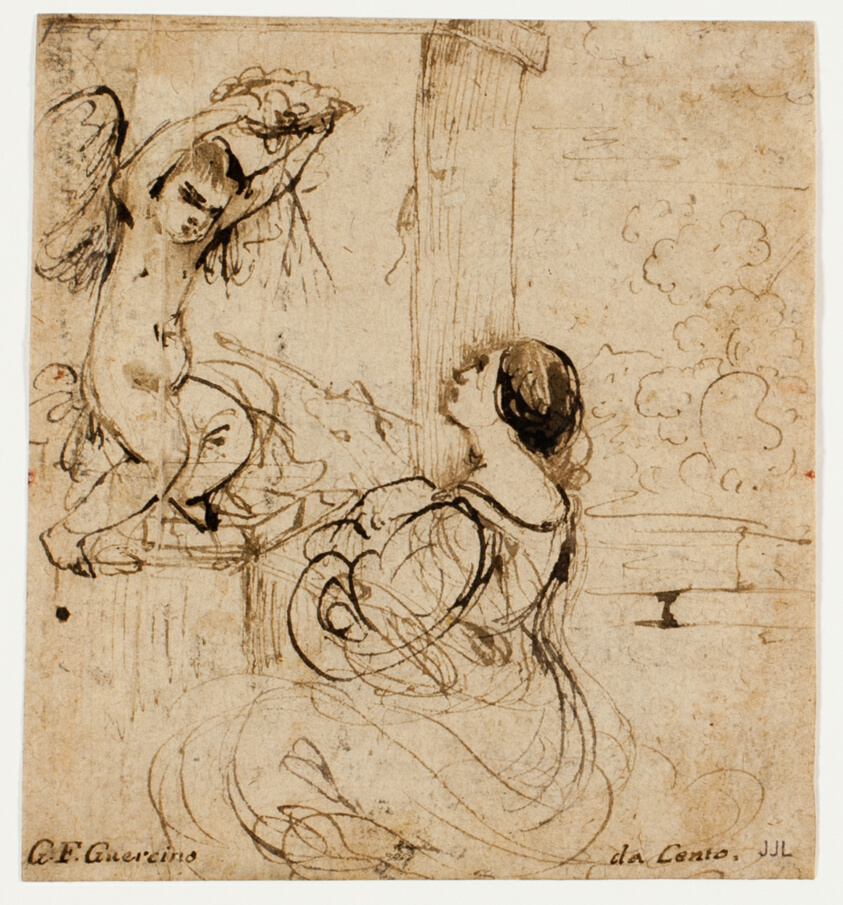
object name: Drawing and Watercolor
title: Woman with Putto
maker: Guercino (Giovanni Francesco Barbieri) (Italian, 1591-1666); possibly after Pier Francesco Mola (Italian, 1612-1666)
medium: Pen wash on cream laid paper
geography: Italy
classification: ink or chalk wash; drawings (visual works); prints and drawing